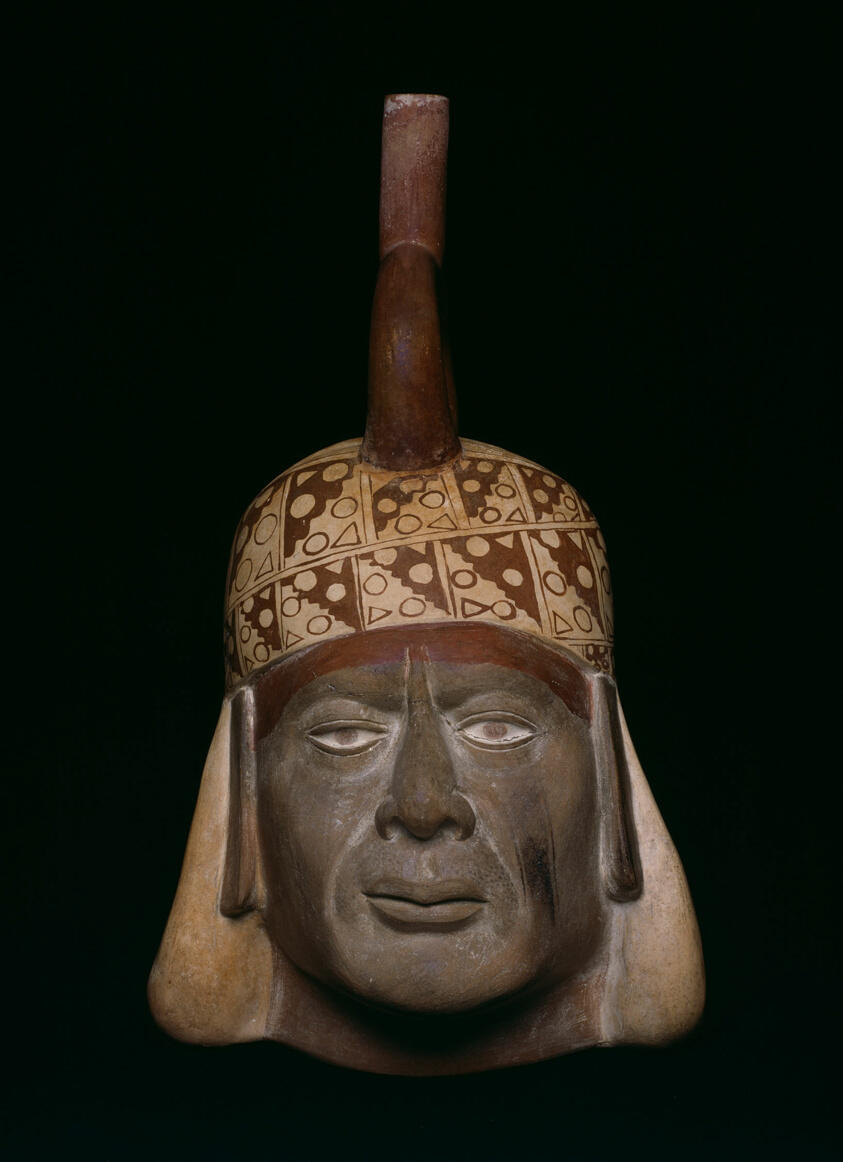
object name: Vessel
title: Portrait Vessel of a Ruler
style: moche, mochica v, mochica, early intermediate period, Pre-Columbian, americas, andes, Arts of the Americas, andean, south american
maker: Moche (North coast, Peru)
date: 100 BCE–500 CE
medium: Ceramic and pigment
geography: Peruvian North Coast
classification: ceramics; earthenware; art of the americas; vessel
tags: people, men, indigenous, red (color), geometric, heads, headwear, portraits, headdresses, rulers (people)